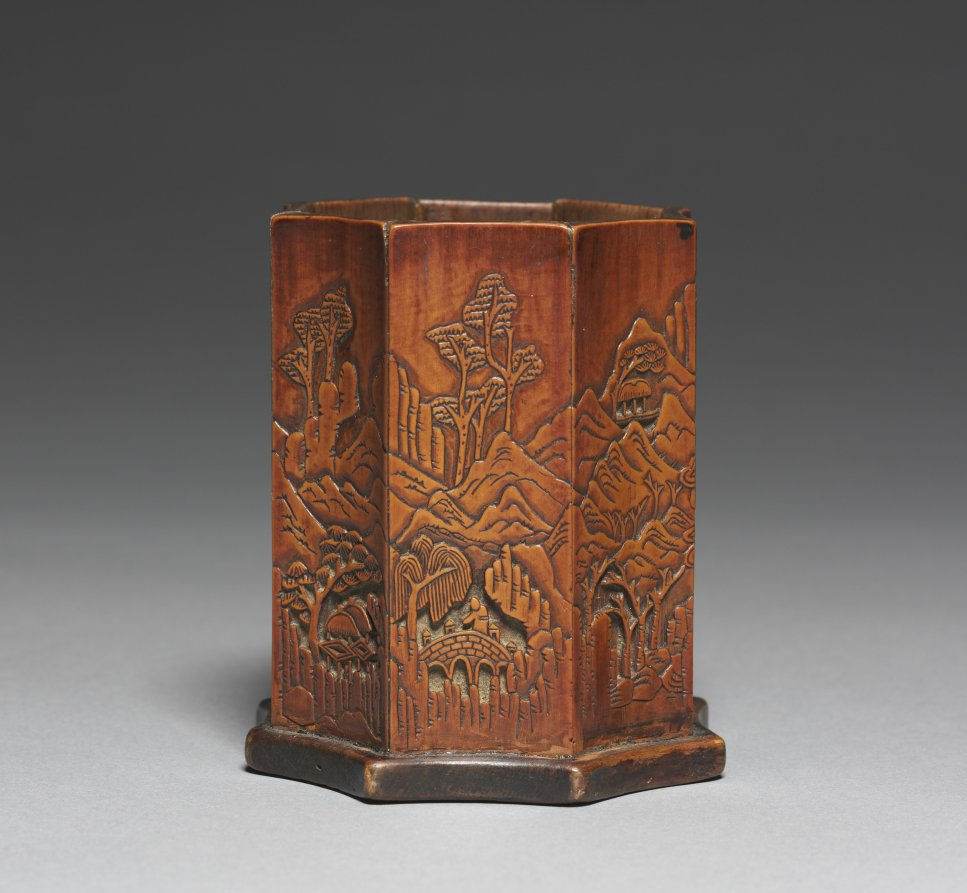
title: Brush Holder with Bamboo and Landscape Design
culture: Korea, Joseon dynasty (1392–1910)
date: 1800s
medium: carved bamboo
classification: Wood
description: An 18th-century Korean collector Yu Man-joo (1755–1788) wrote that “spending money on luxury clothing, dishes, and decorations for the home is a waste, but acquiring fancy writing tools helps to develop elegant taste and high-mindedness.” Inspired by aesthetic discourses on elegance versus vulgarity in late Ming Chinese literature, Korean collectors in the late 1700s and 1800s strove to assemble objects that would display their intellect and sophisticated taste. Stationery objects in particular—printed books, finely crafted brushes, brush holders, ink stones, water droppers, stone wares with grayish-white crackled glazes as well as bronze vessels, and incense burners—were all objects that reflected pure and elegant taste.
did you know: Stationery objects such as this brush holder were highly appreciated among scholars, not only for their function, but for their aesthetic.